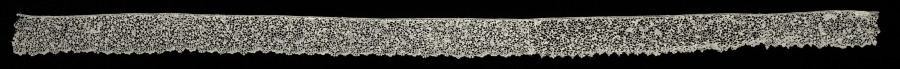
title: Lace Edging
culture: Belgium, Brussels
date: early 1700s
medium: Linen: needle lace (Point d'Angleterre)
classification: Lace